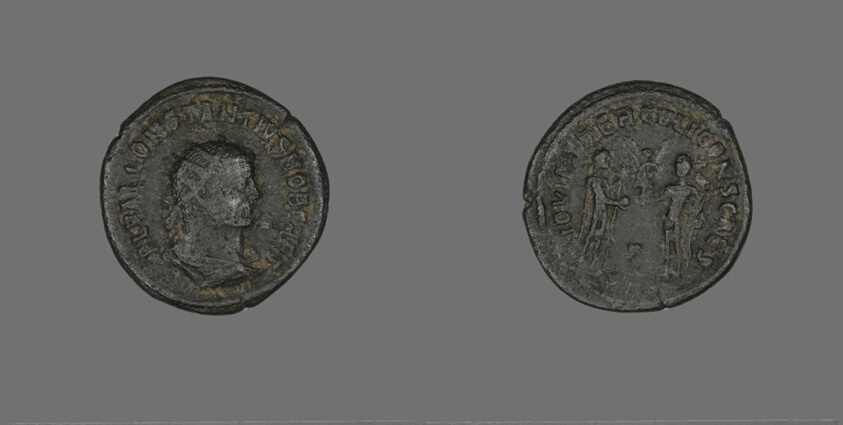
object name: Coin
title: Coin Portraying Emperor Constantius I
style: imperial (roman), ancient, roman (ancient, style or period)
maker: Roman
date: 293-305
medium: Bronze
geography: Roman Empire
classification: coin; ancient art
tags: Heracles